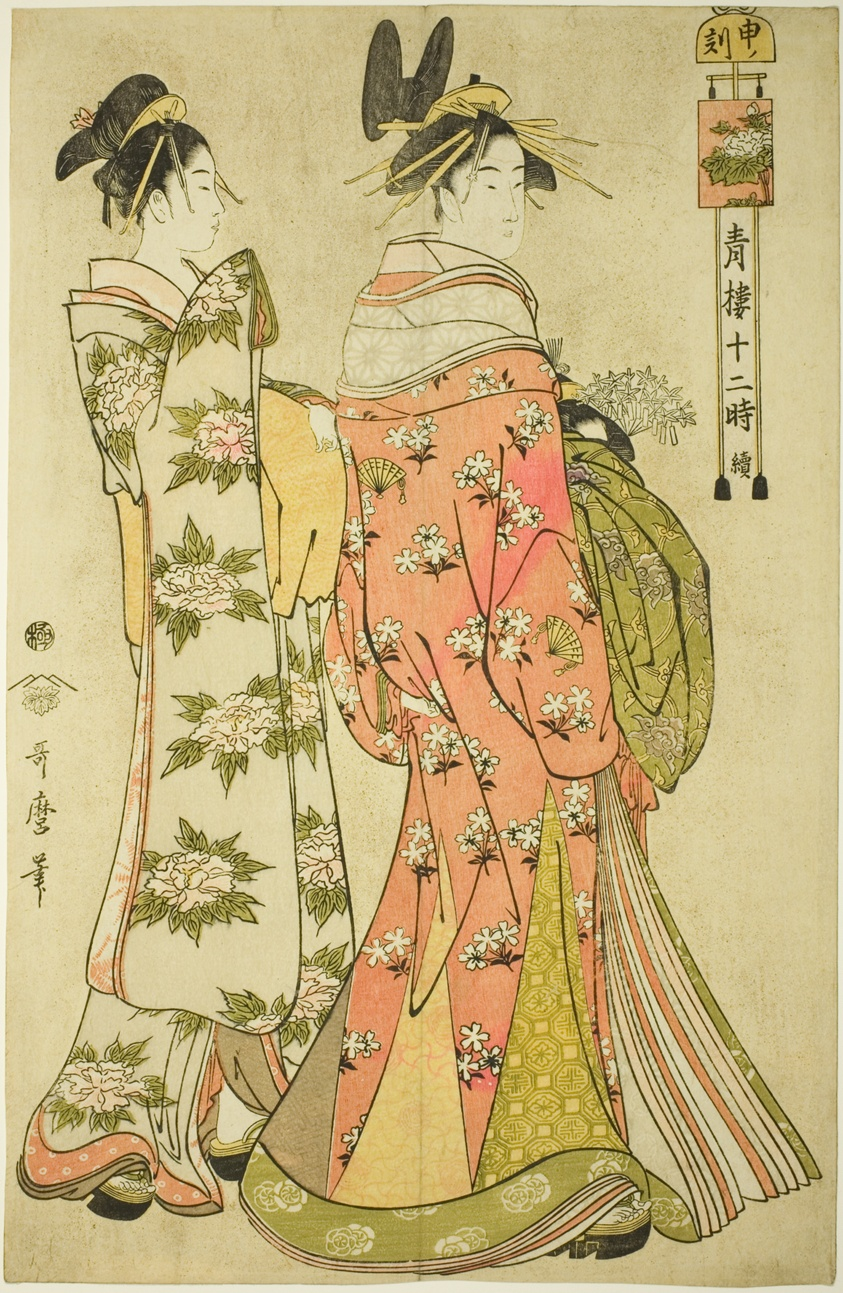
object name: Print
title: Hour of the Monkey [4pm] (Saru no koku), from the series “The Twelve Hours in Yoshiwara” ("Seiro juni toki tsuzuki")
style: Japanese (culture or style)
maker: Kitagawa Utamaro 喜多川 歌麿; Japanese, 1753 (?)-1806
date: c. 1794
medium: Color woodblock print; oban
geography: Japan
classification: woodblock print; print; asian art